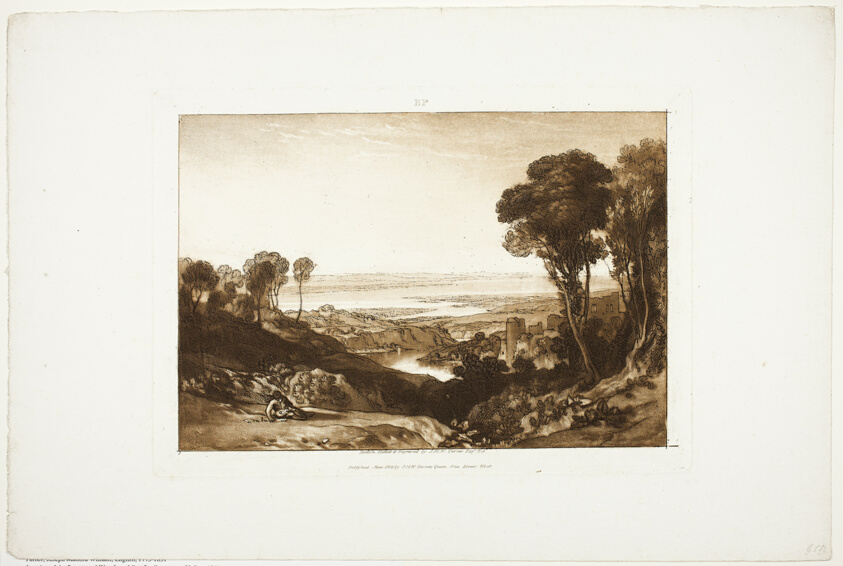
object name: Print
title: Junction of the Severn and Wye, from Liber Studiorum, no. 28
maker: Joseph Mallord William Turner (English, 1775-1851)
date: June 1811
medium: Etching, mezzotint and aquatint in brown on ivory wove paper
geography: England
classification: etching; print; prints and drawing